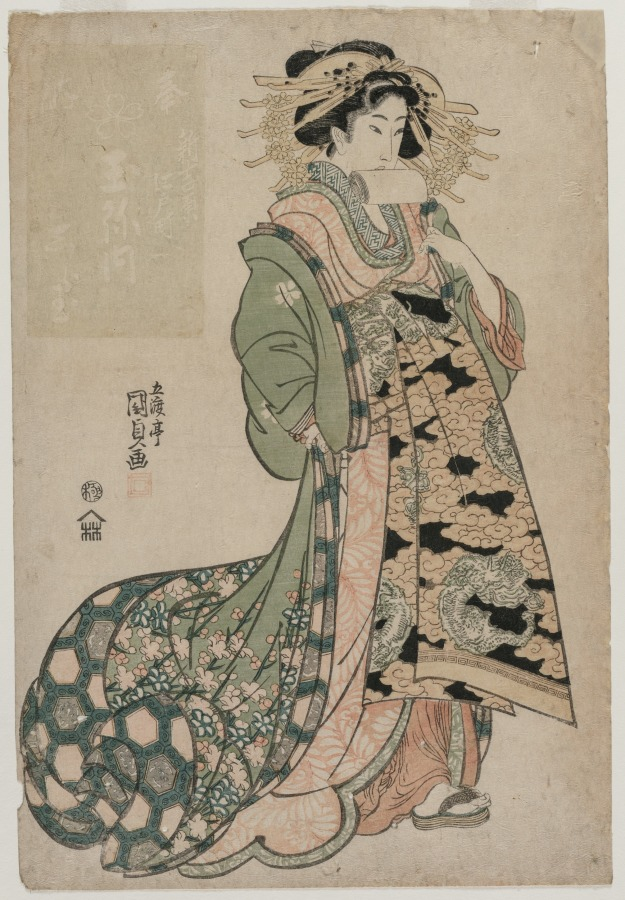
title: The Courtesan Shiratama of the Tamaya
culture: Japan, Edo period (1615–1868)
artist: Utagawa Kunisada (Japanese, 1786–1865)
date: c. early 1810s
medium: color woodblock print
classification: Print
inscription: Signature: Gototei Kunisada ga Artist Seal: Sada Publisher: Iseya Rihei (emblem)